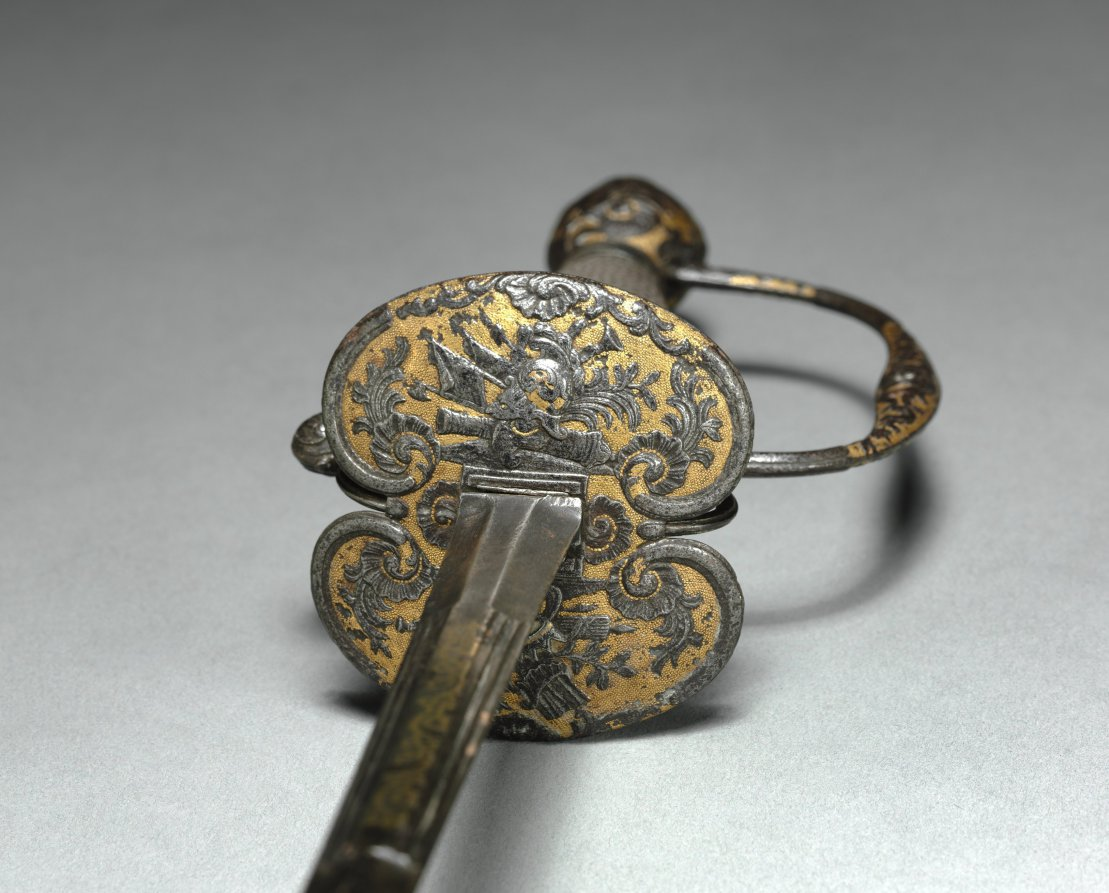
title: Child's Sword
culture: France, Paris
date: c 1780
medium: stainless steel, silver and brass wire inlay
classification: Arms and Armor